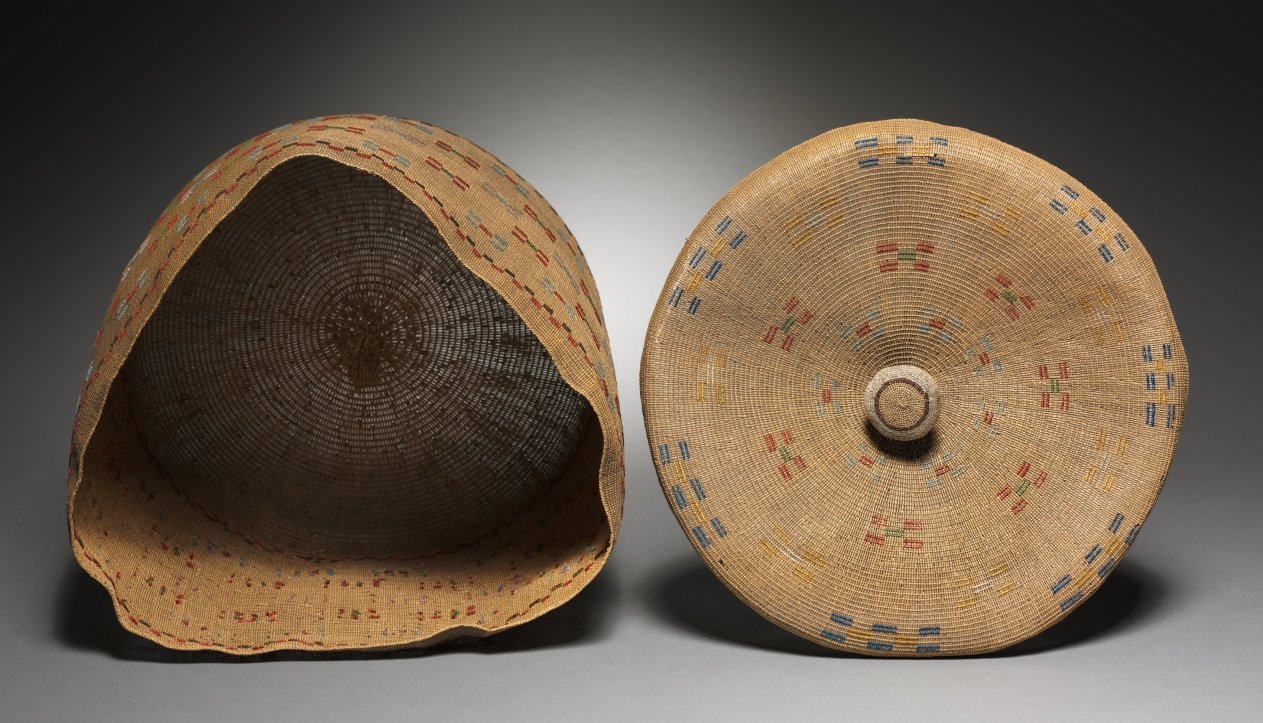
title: Covered Twined Cylindrical Basket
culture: Arctic. Aleut (Attu), late 19th-early 20th century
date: late 1800s–early 1900s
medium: twined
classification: Basketry